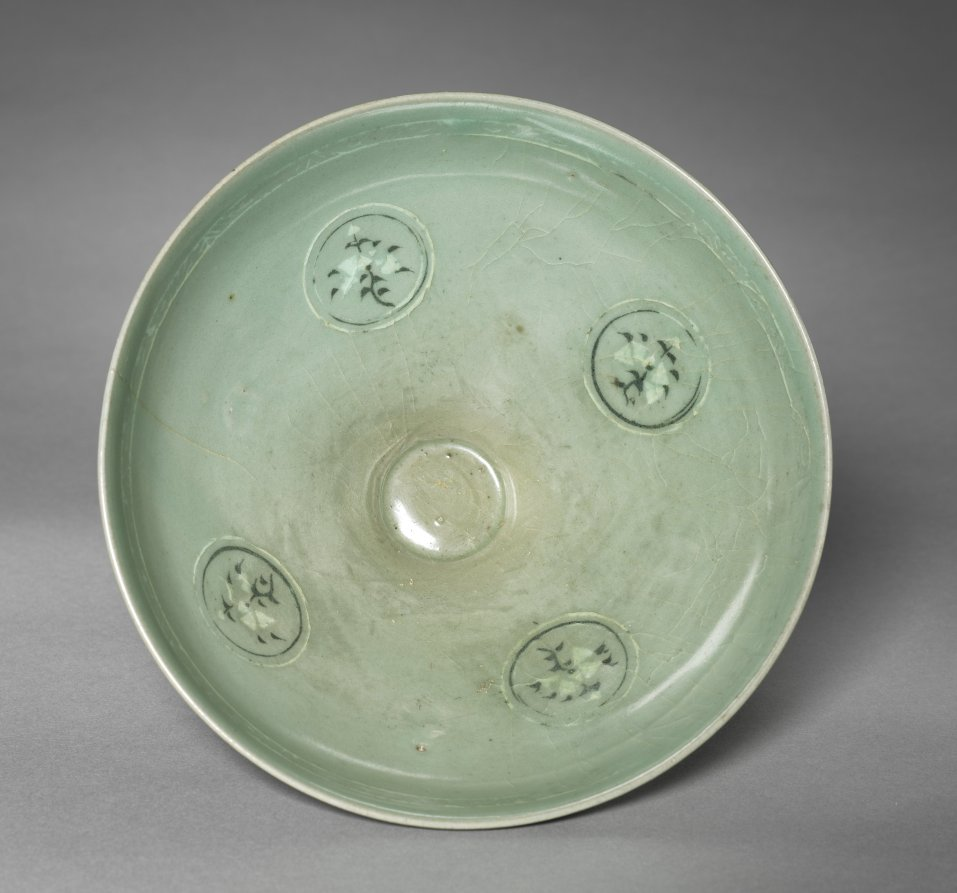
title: Bowl with Inlaid Chrysanthemum and Peony Design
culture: Korea, Goryeo dynasty (918–1392)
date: 1100s–1200s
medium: pottery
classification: Ceramic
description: As early as the seventh century, the practice of drinking tea and wine became an important part of elite leisure culture in Korea. A wide bowl like this example was especially suitable for drinking powdered tea shaved from a compressed tea cake, the most commonly enjoyed type during the Goryeo period. The inlaid image of bloomed peonies on the inner wall of this tea bowl must have made the moment of drinking tea more enjoyable.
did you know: Kangjin and Buan kilns in Jeolla province were the two major production centers for celadon wares during the Goryeo period (918–1392).